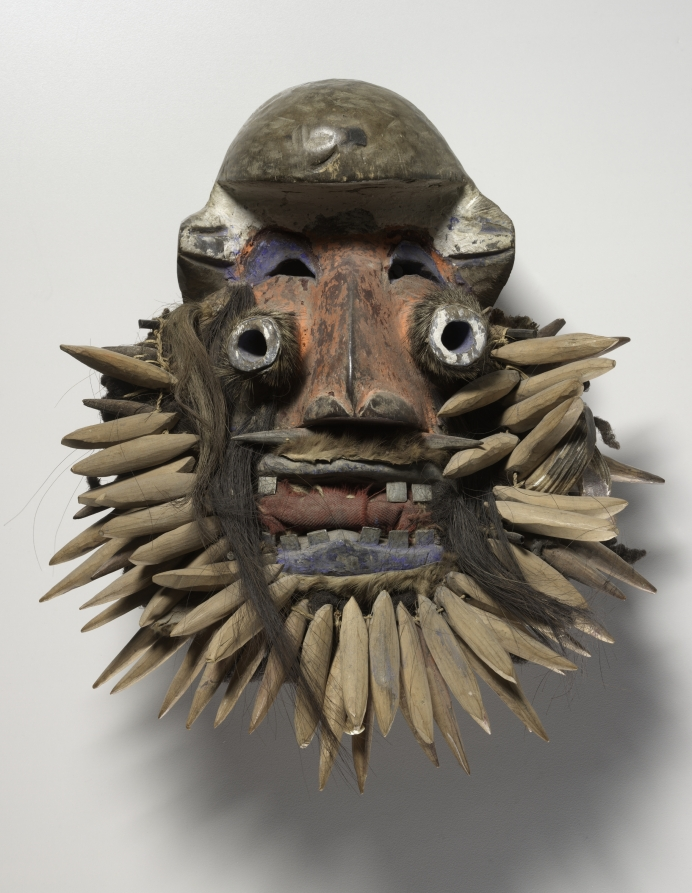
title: Face Mask (Tehe gla)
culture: Africa, West Africa, Côte d'Ivoire or Liberia, Wè-style carver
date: early 1900s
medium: Wood, boar tusks, pelt, cloth, human hair, probably aluminum, reeds, iron alloy, copper alloy, plant fiber, and paint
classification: Mask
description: Tubular eyes and the fringe of carved leopard canine teeth identify this mask as male. Such masks appeared only during very important moments. The dancer wore a leopard skin over his head and shoulders, held an elephant's tusk in his hand, and had his face painted white. The masks function as peacemakers; they led soldiers into battle, and administered justice.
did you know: The masquerader who wore this mask also had a body costume of layers of raffia and matching anklets; cloth covered their head.